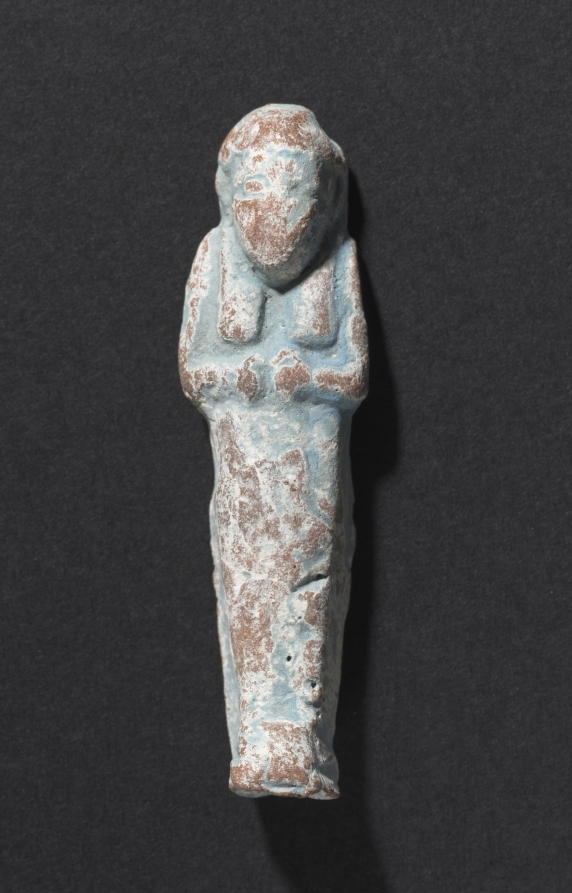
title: Shawabty of Ditamenpaankh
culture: Egypt, Late period (715–332 BCE), Dynasty 25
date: 715–656 BCE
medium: terracotta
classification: Funerary Equipment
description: High demand for shawabtys in the Late Period, a time when as many as 400 or more shawabtys were placed in the tomb with the deceased, gave rise to a specialized container for storing them: the shawabty box. This example is inscribed for the lady of the house, Ditamenpaankh, and was probably one of a pair originally made for her. The single-masted boat on the box's lid is perhaps an allusion to the pilgrimage of the deceased to the holy city of Abydos, the cult city of Osiris, king of the dead. The shawabtys inside are crude, mass-produced examples cast in an open mold. Made of terracotta, their blue paint imitates more costly shawabtys made of faience. As for the shawabty spell, it has been removed from its traditional location on the shawabty's front and relocated onto the sides of box, where it needed only to be written once, thus expediting production.